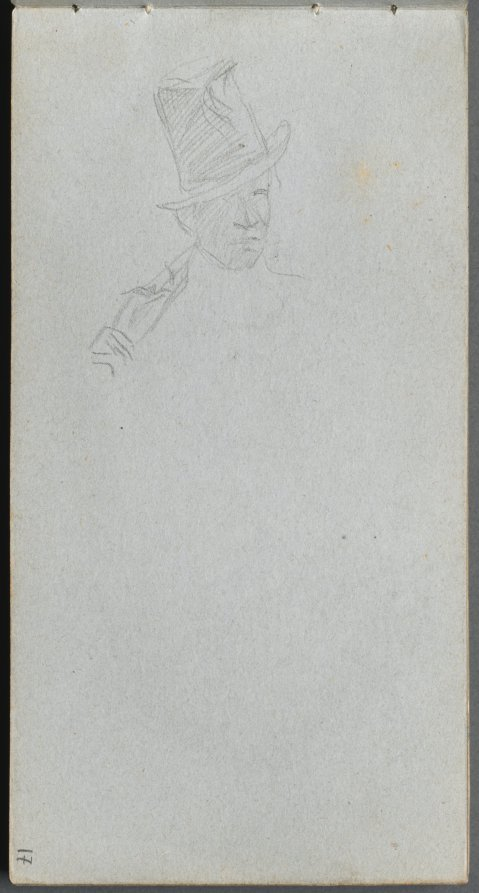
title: Sketchbook, page 17: Bust of a Man in Top Hat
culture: France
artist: Ernest Meissonier (French, 1815–1891)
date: c. 1860s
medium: graphite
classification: Bound Volume